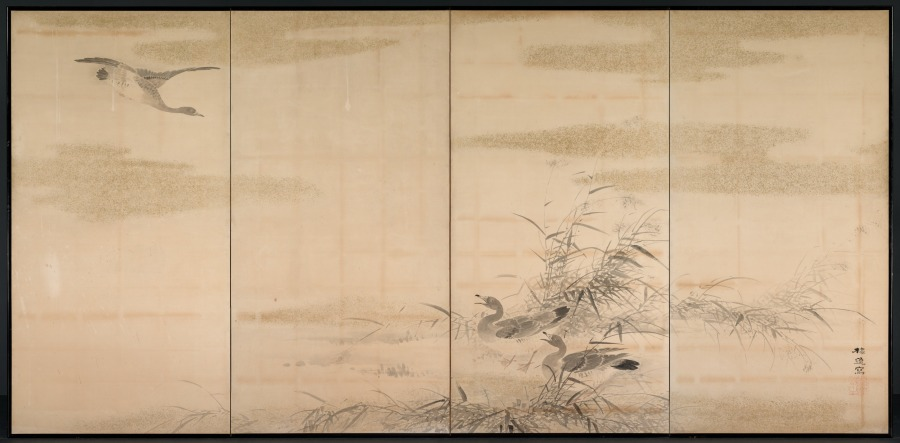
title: Geese, Reeds, and Water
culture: Japan, Edo period (1615–1868)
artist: Yamamoto Baiitsu (Japanese, 1783–1856)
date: 1800s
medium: Pair of four-panel folding screens; ink, color, and cut gold foil on paper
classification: Painting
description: This byōbu composition differs from most in that it comprises two four-panel screens, rather than two six-panel units. Since the current mounting is modern, it is impossible to determine whether its present configuration represents its original design. Some panels may have been removed to help the screens better fit into a modern interior space. Baiitsu worked almost exclusively in monochromatic ink tones and favored classical Chinese painting themes.